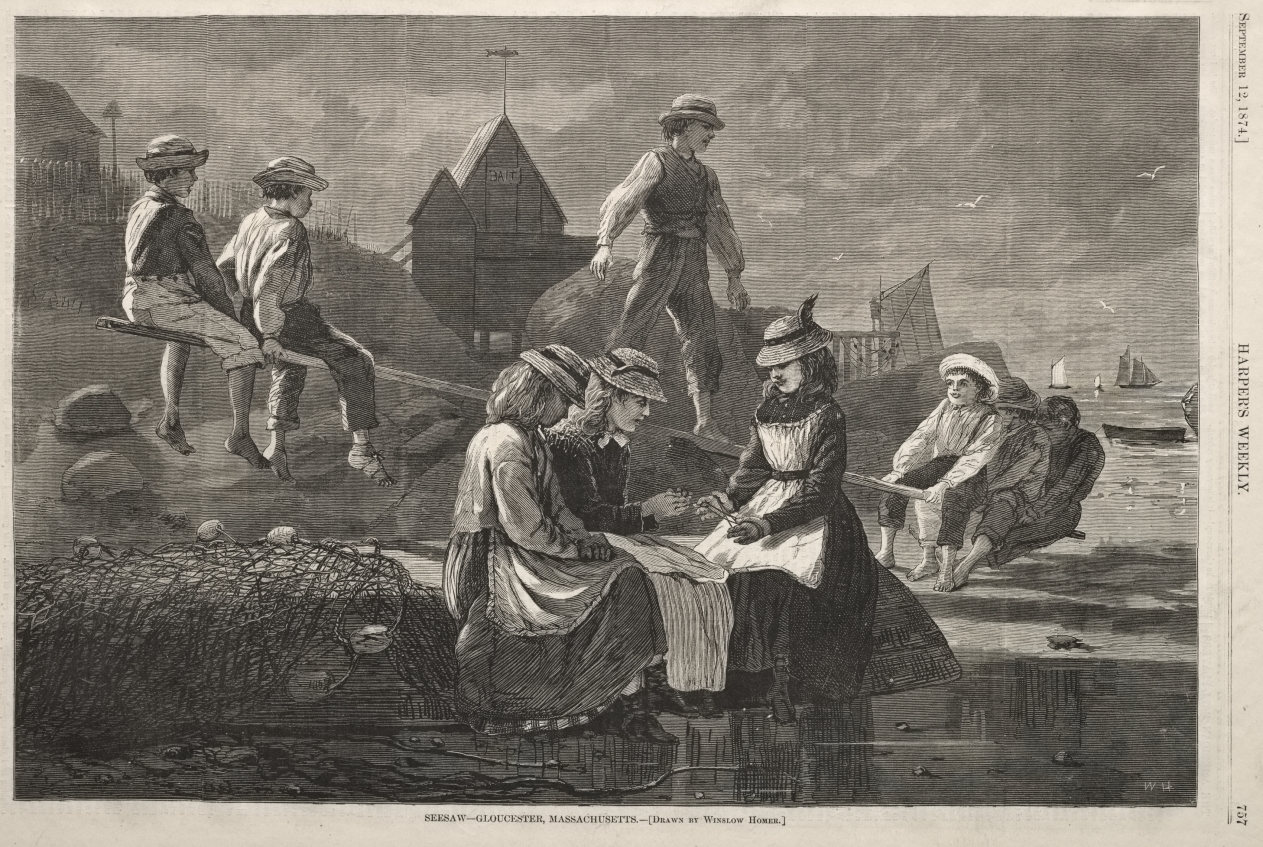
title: See Saw - Gloucester, Massachusetts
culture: America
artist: Winslow Homer (American, 1836–1910)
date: 1874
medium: wood engraving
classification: Print